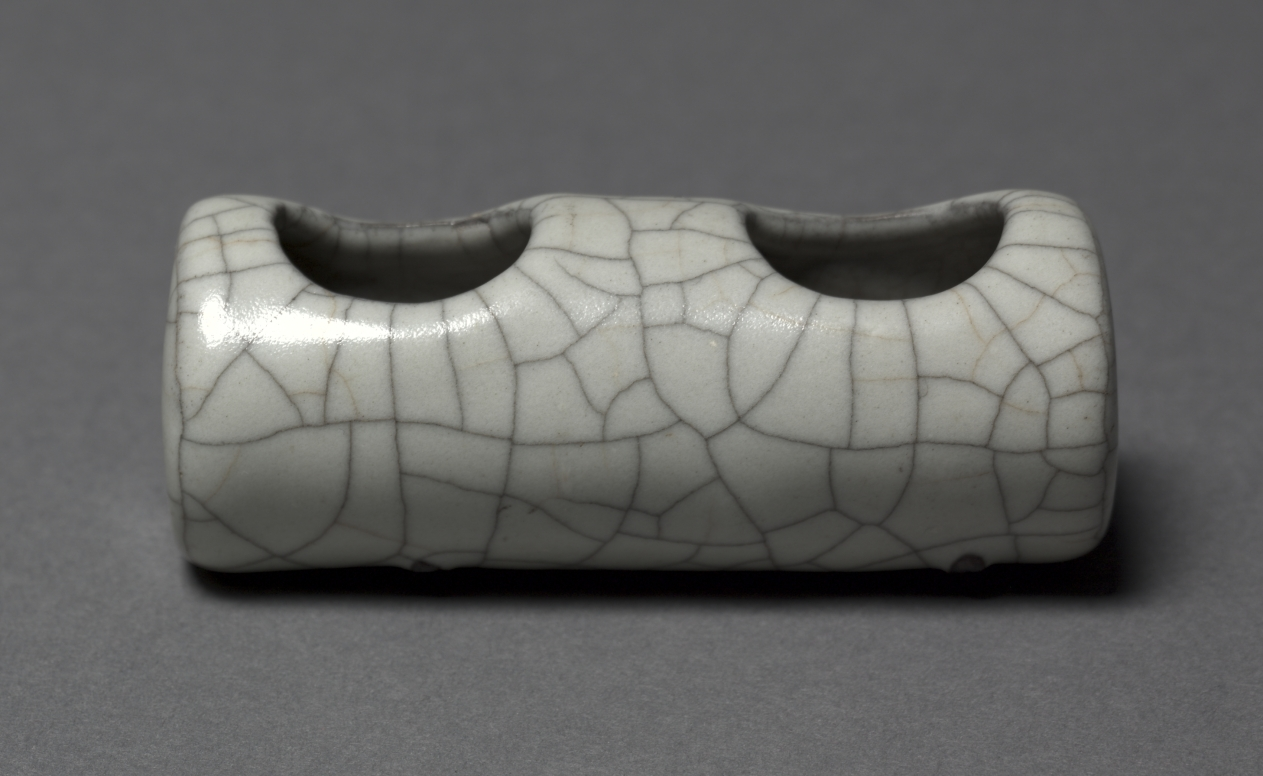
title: Bird feeder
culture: China, Song dynasty (960-1279)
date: 960–1279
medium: Glazed reddish-brown stoneware, Guan ware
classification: Ceramic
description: Walking small birds in bamboo cages furnished with precious porcelain feeders is a traditional leisure time pursuit of elderly men in China.